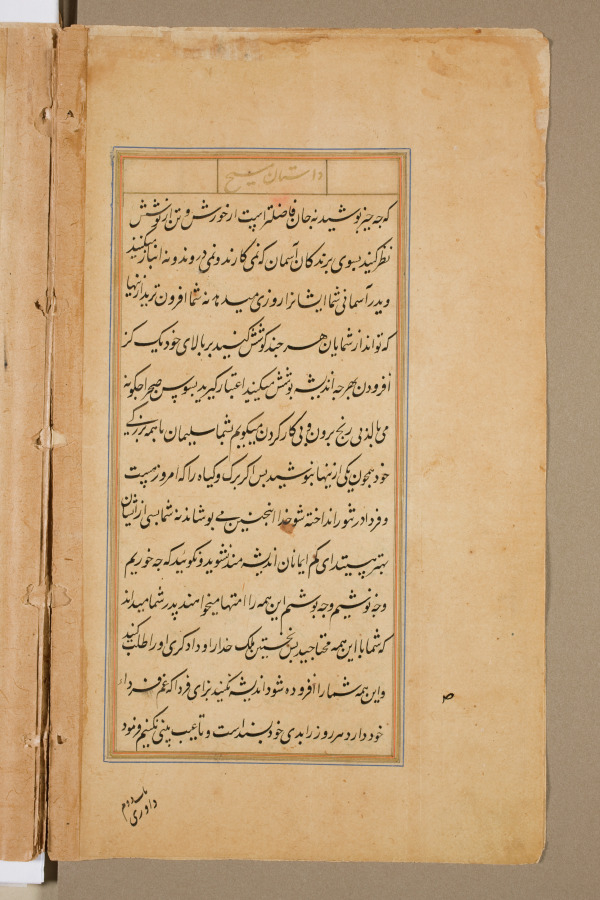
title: Text page from a Mirror of Holiness (Mir’at al-quds) of Father Jerome Xavier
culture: Mughal India, Allahabad, made for Prince Salim (1569–1627)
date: 1602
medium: Ink and gold on paper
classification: Manuscript